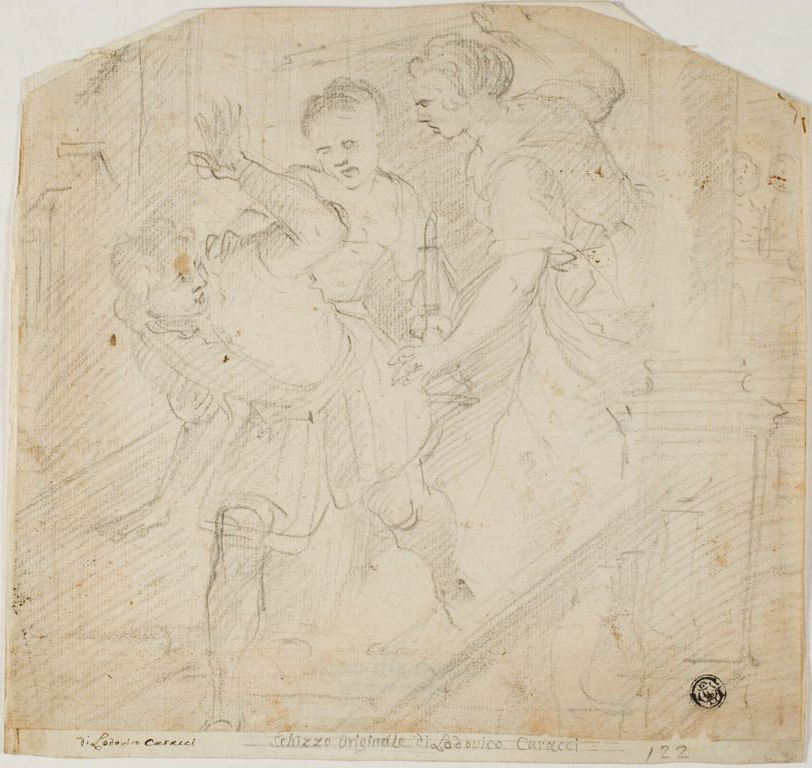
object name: Drawing and Watercolor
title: Two Women Chasing a Man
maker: Lodovico Carracci (Italian, 1555-1619); or Domenico Fiasella (Italian, 1589-1669)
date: 17th century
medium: Black chalk on ivory laid paper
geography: Italy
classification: chalk; drawings (visual works); prints and drawing